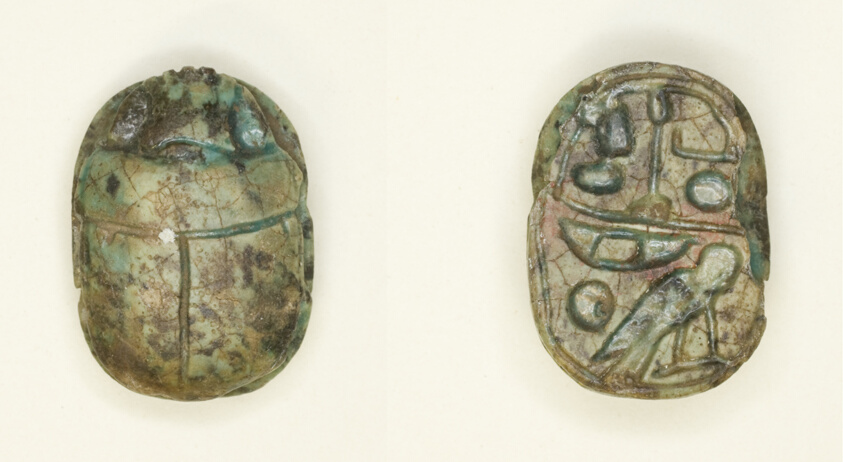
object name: Costume and Accessories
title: Scarab: Hieroglyphs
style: egyptian, third intermediate period, new kingdom, late period (egyptian), ancient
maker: Egyptian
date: New Kingdom–Late Period, Dynasties 18–26 (about 1550–525 BCE)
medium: Glazed steatite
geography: Egypt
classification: scarab; seal; amulet; ancient art; costume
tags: scarab beetle, Hieroglyphs